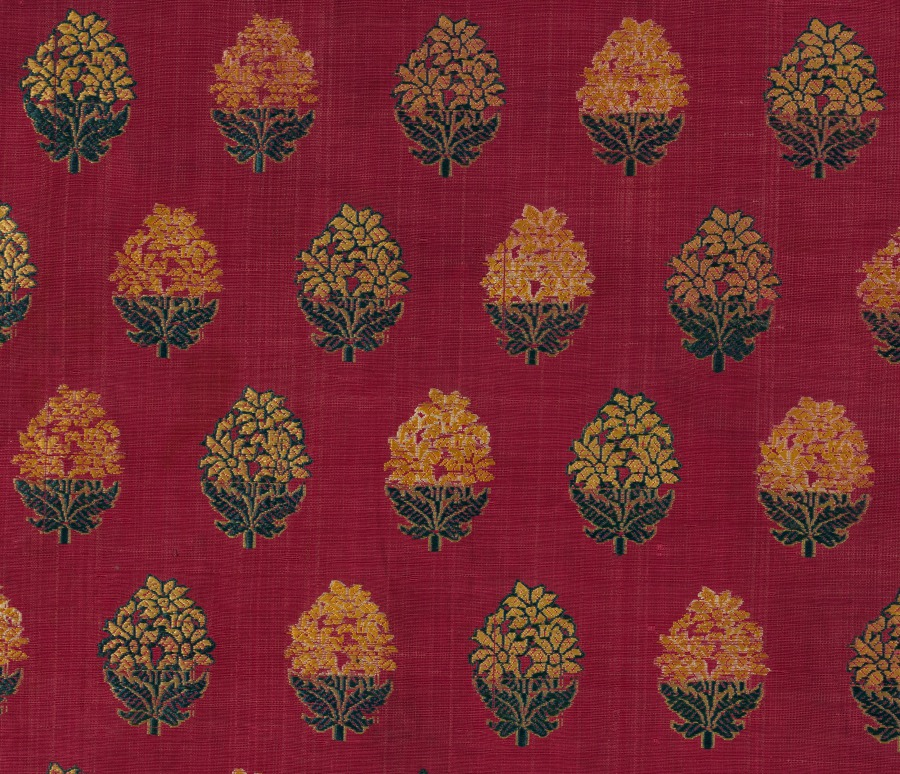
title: Brocade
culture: India, Surat, 18th or 19th century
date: 1700s or 1800s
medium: brocade, "himru"; silk and cotton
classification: Textile